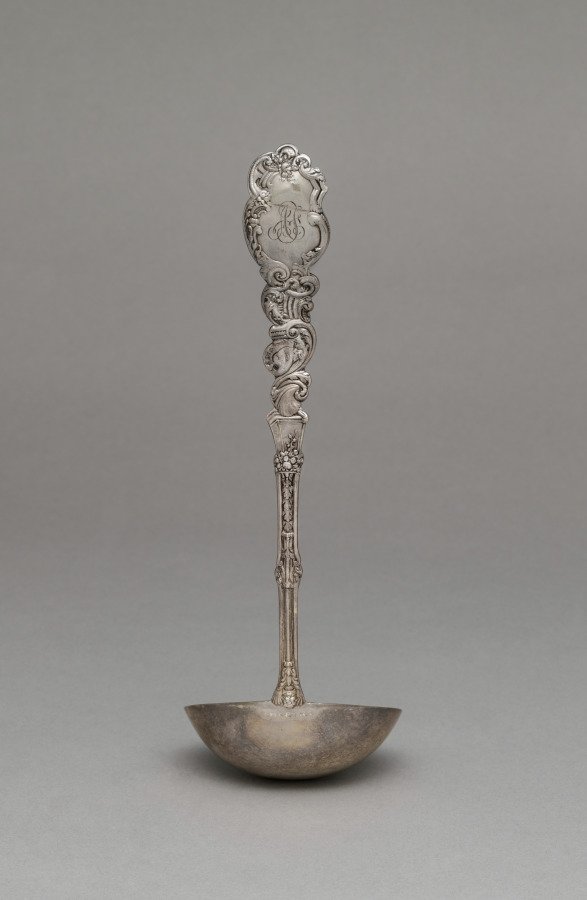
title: Ladle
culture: America, New York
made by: Gorham Manufacturing Company (America, est. 1831)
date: c. 1905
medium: silver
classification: Silver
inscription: engraved "AFR" on back of handle end.